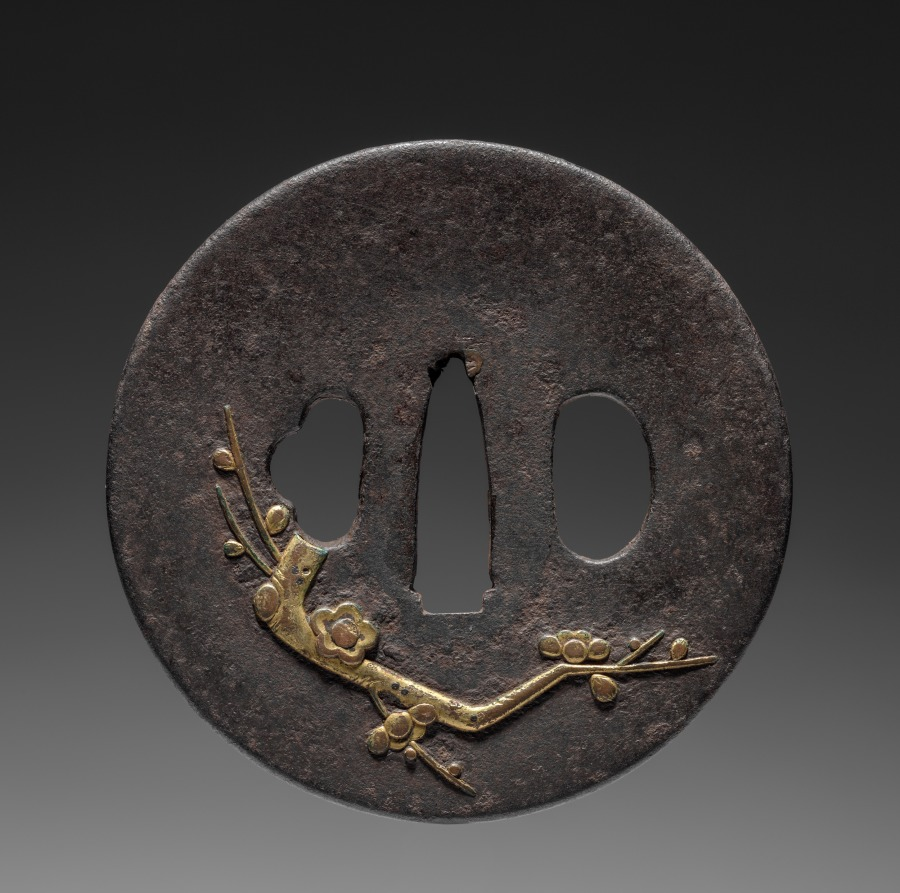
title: Sword Guard (Tsuba)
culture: Japan, Edo period (1615–1868)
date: mid-1800s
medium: iron with high relief of copper gilt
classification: Arms and Armor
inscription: signed "Nagahori."